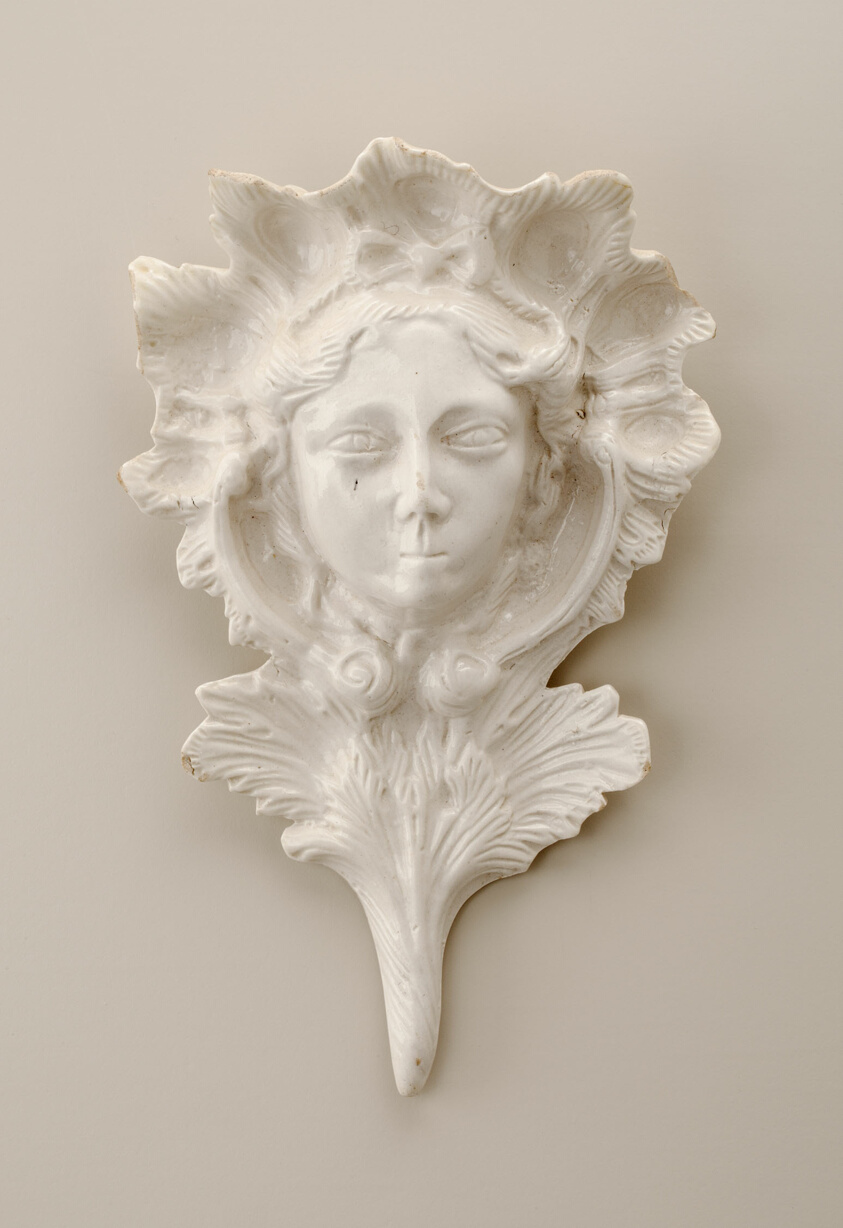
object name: Ceramics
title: Wall Pocket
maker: Staffordshire, England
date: c. 1750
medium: Salt-glazed stoneware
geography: Staffordshire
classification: stoneware; ceramics; european decorative arts; salt-glazed stoneware